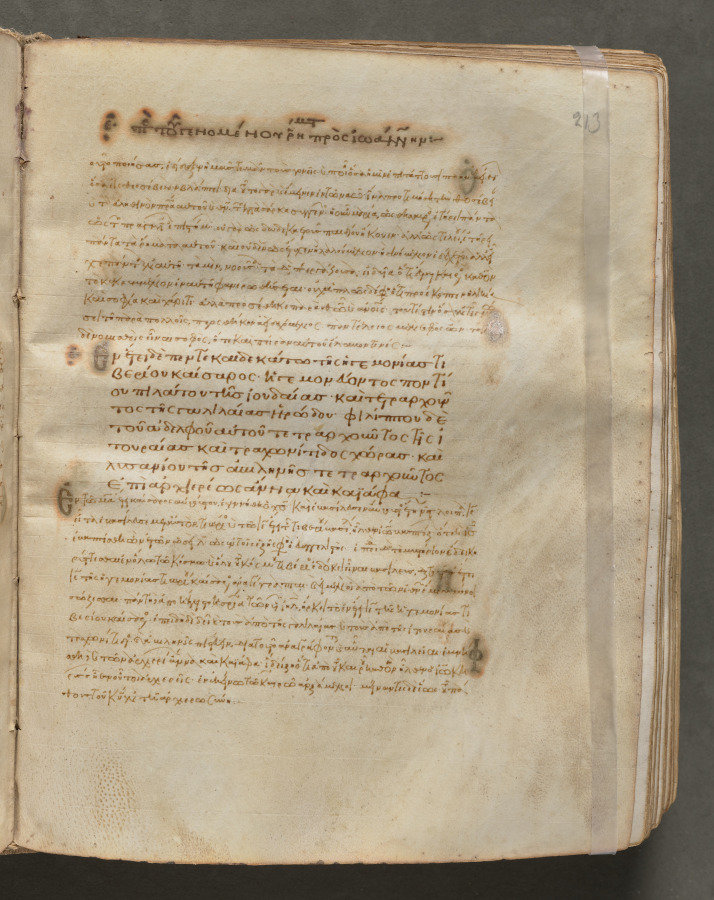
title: Text, folio 213 (recto), from a Gospel Book with Commentaries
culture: Byzantium, Constantinople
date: c. 1000–1100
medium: ink, tempera, and gold on vellum; leather binding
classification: Bound Volume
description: Each of the four gospels in this book opens on a page with brilliantly illuminated borders depicting the author of the text as well as birds-principally peacocks, symbols of the immortality of the soul-and fountains, representing the fountain of life and the salvation of the soul. This volume consists of 428 leaves with texts in Greek. Its level of sophistication suggests that it was probably written and decorated in a monastery in Constantinople.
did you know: Gospel Books were carried in procession through Byzantine churches.